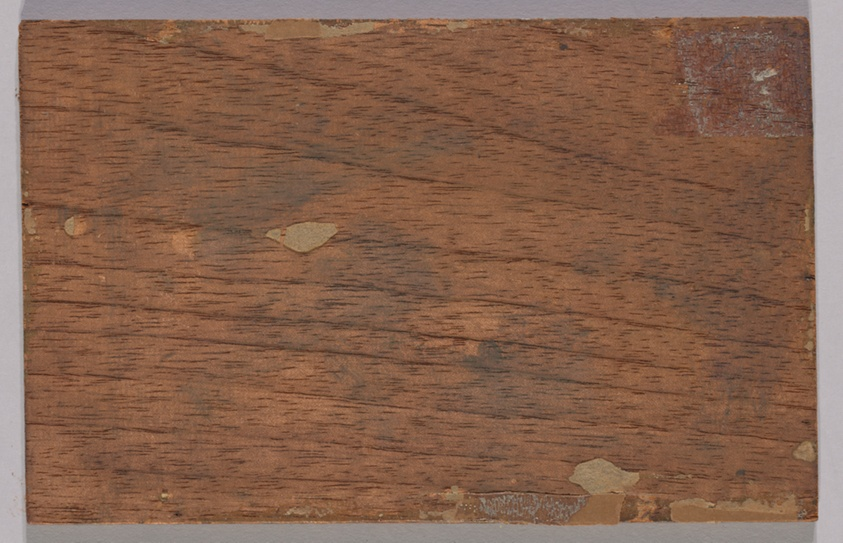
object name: Painting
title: Landscape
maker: William Keith (American, born Scotland, 1839–1911)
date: 1868-1900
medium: Oil on panel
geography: United States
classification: painting; modern and contemporary art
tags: landscape